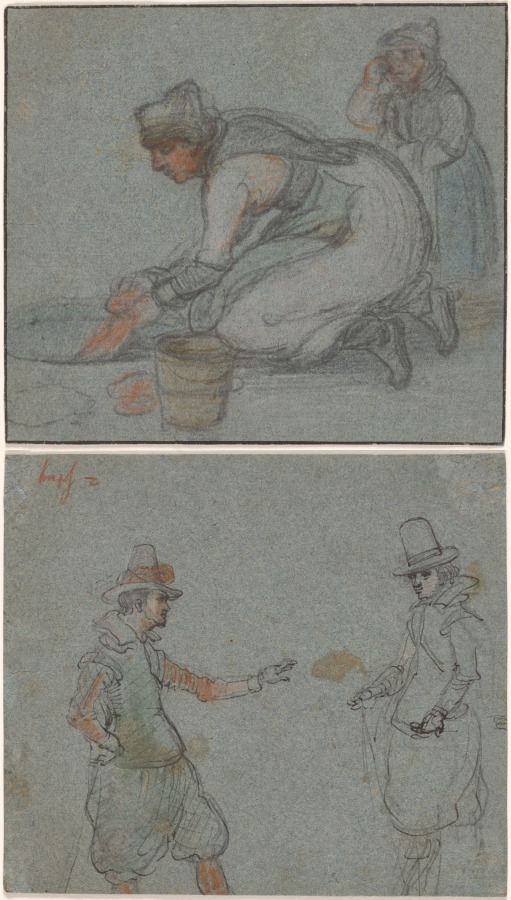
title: A Woman Doing Laundry in an Ice Hole (recto); Two Gentlemen (verso)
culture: Netherlands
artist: Hendrick Avercamp (Netherlandish, 1585–1634)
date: c. 1618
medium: black and red chalk, graphite, watercolor, pen and black ink, black and red chalk, graphite, watercolor (verso) on blue paper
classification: Drawing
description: Seventeenth-century Dutch artist Hendrick Avercamp became widely known for his near-exclusive production of winter landscapes, often featuring large crowds made up of different social classes congregated on the Netherlands’ iced canals and rivers and engaged in various activities from ice skating and socializing to doing laundry, fishing, and hauling goods. In this drawing, he sketched a woman squatting to do laundry at a hole in the ice, accompanied by a child who wipes tears from her eyes. On the verso (back) of the same sheet, two men in elegant, middle-class attire appear to be socializing. The artist kept such sheets in his workshop for reference in his larger, multi-figured, finished compositions.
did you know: Though incomplete due to the cut of the sheet, the gestures of the men on the back of this drawing suggest they could be engaged in a game of kolf, a ball and paddle game played on the ice that appears frequently in the artist’s winter scenes.